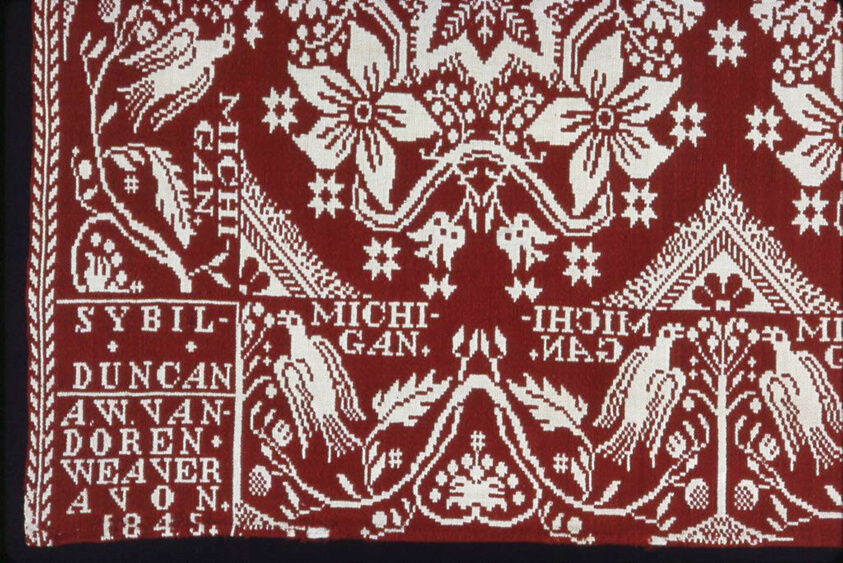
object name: Textile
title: Coverlet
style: 19th century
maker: Abram William Van Doren (American, 1808–1884); United States, Michigan, Oakland County, Avon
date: 1845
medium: Cotton and wool, plain weave double cloth; woven on loom with Jacquard attachment; two loom widths joined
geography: Michigan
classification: weaving - coverlet; coverlet; weaving; textile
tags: medallions, star, trees, fruit, foliage, birds, vines, lilies, flowers, coverlet